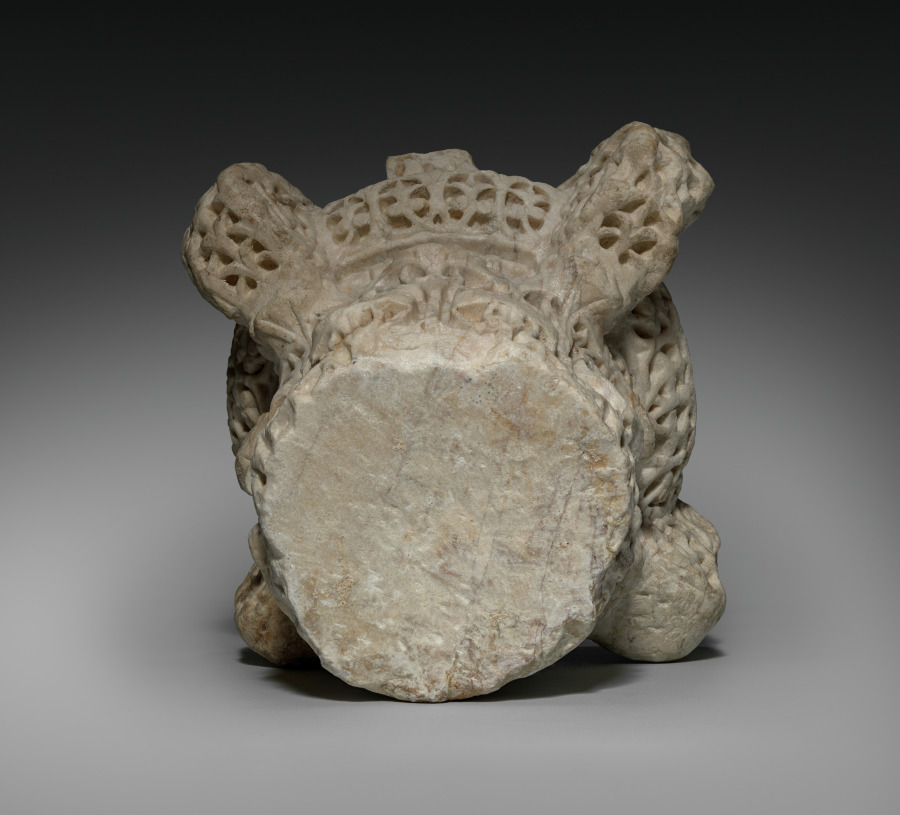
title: Column Capital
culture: Spain, Cordoba, Madinat al-Zahra, Spanish Umayyad period (756–1031)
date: c. 960–76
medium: Marble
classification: Sculpture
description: This capital comes from the palatial city of Madinat al-Zahra near Cordoba (Spain) which was begun by caliph Abd al-Rahman III (r. 912–61) around 936. Large parts of the Iberian Peninsula were then under Islamic rule and experienced a cultural flowering. The city, destroyed already in 1010, was the most magnificent palace complex in Europe at the time.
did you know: In the mid-1800s the ruins of Madinat al-Zahra were rediscovered and became the source of great fascination as people imagined a palace like that in the stories of One Thousand and One Nights.